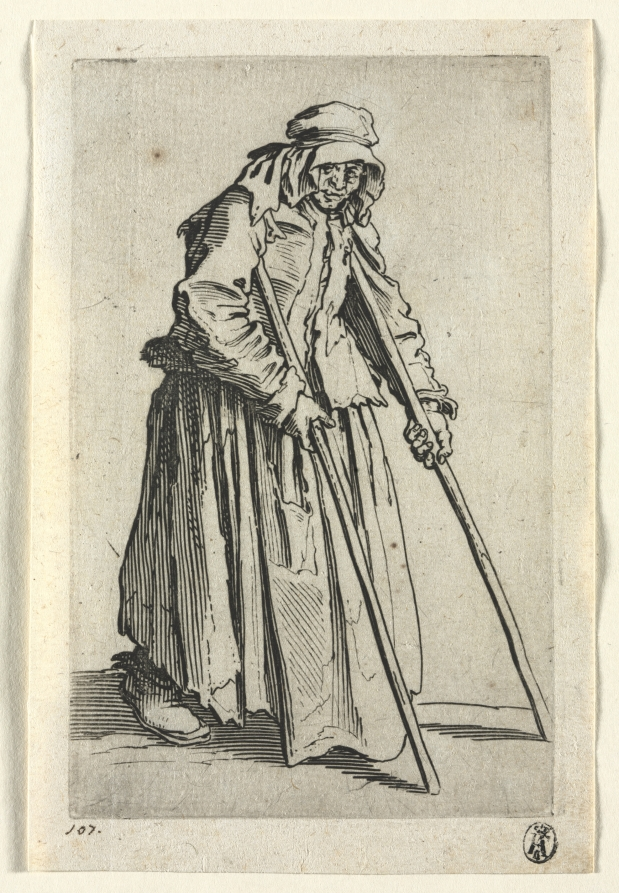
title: The Beggars: Beggar Woman on Crutches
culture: France, 17th century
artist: Jacques Callot (French, 1592–1635)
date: c. 1623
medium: etching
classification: Print